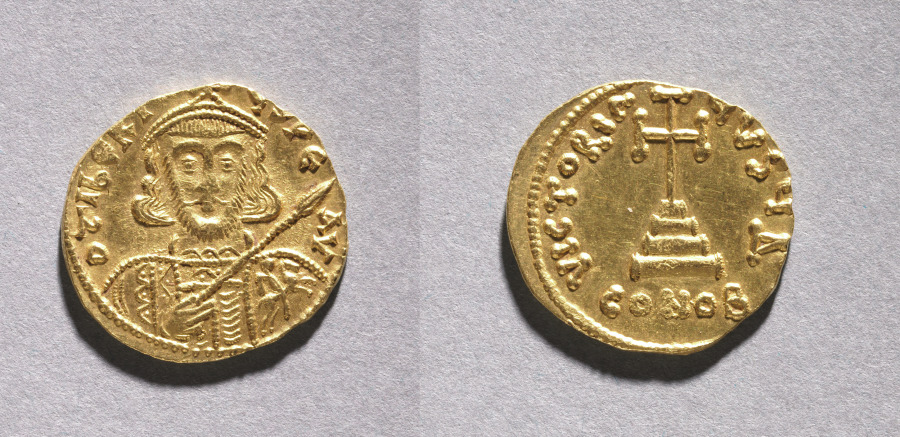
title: Solidus with Tiberius III Apsimarus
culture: Byzantium, Constantinople, late 7th-early 8th century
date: 698–705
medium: gold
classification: Coins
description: The vast number of surviving Byzantine coins attests to the level of trade across the empire. Controlled and supervised by the emperor, the producers of coins took care to represent his authority and reflect his stature. Talented artists were recruited to engrave the dies (molds) used for the striking of coins. Emperors increasingly came to include their heirs and co-emperors on their coinage, as well as other family members or even earlier rulers. Coins were recognized, then as now, as small, portable works of art. With their inscriptions and images, Byzantine coins provide valuable documentation of historical events and a record of the physical appearance of the emperors. The coins shown here include the solidus, the basic gold coin of 24 karats; the tremissis, a gold coin of one-third the weight and value of the solidus; and the nomisma, which in the 10th century replaced the solidus as the standard gold coin.